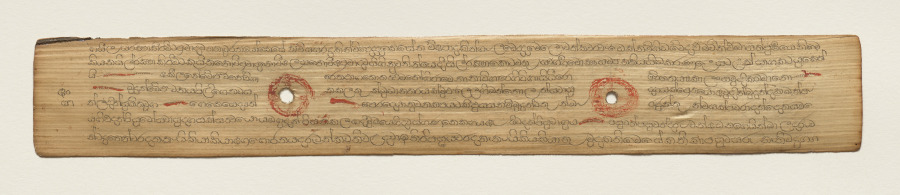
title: Leaf from a Buddhist Manuscript (recto)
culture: Sri Lanka, Singhalese, Late 17th century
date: c. 1700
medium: fiber paper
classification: Manuscript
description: Palm leaf material is still used for manuscripts in Sri Lanka. The palm leaves are prepared first by boiling them, drying them in the sun, and then rubbing them with oils. Scribes then use a metal stylus to incise the text. Then charcoal powder is wiped across the pages, filling in only the inscribed lines.